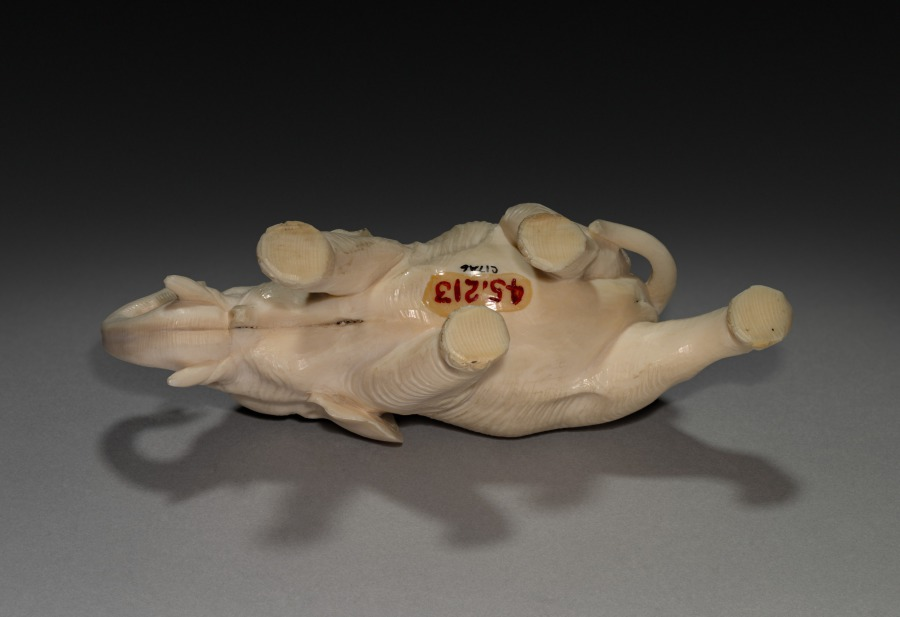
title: Elephant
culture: Japan, Meiji period (1868–1912)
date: early 1900s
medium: ivory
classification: Ivory